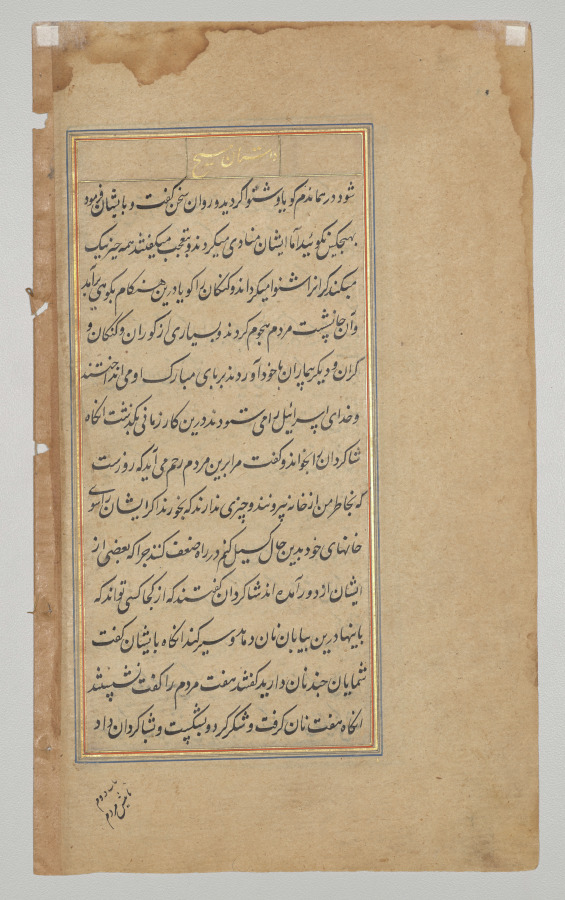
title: Text page from a Mirror of Holiness (Mir’at al-quds) of Father Jerome Xavier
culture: Mughal India, Allahabad, made for Prince Salim (1569–1627)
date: 1602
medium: Ink and gold on paper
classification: Manuscript